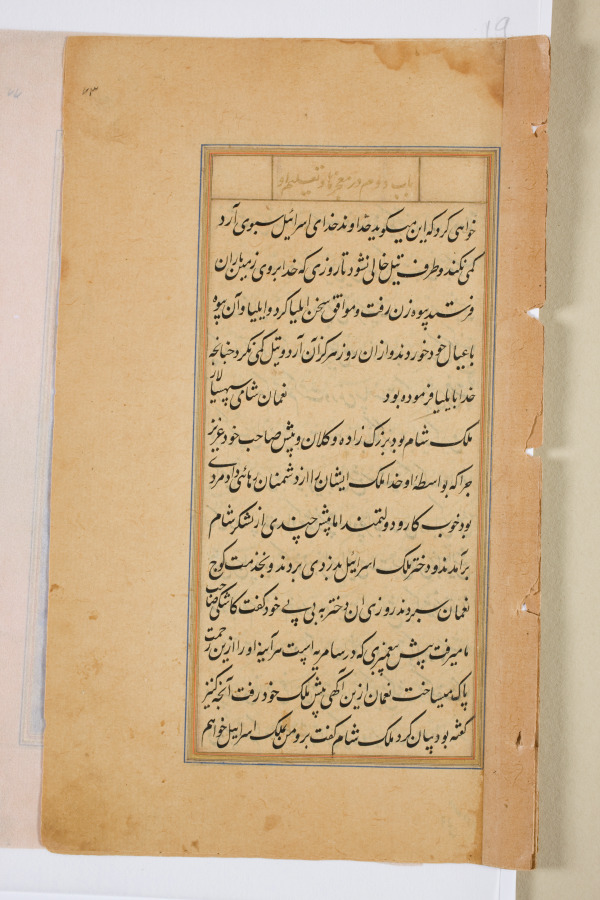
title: Text page from a Mirror of Holiness (Mir’at al-quds) of Father Jerome Xavier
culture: Mughal India, Allahabad, made for Prince Salim (1569–1627)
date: 1602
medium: Ink and gold on paper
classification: Manuscript